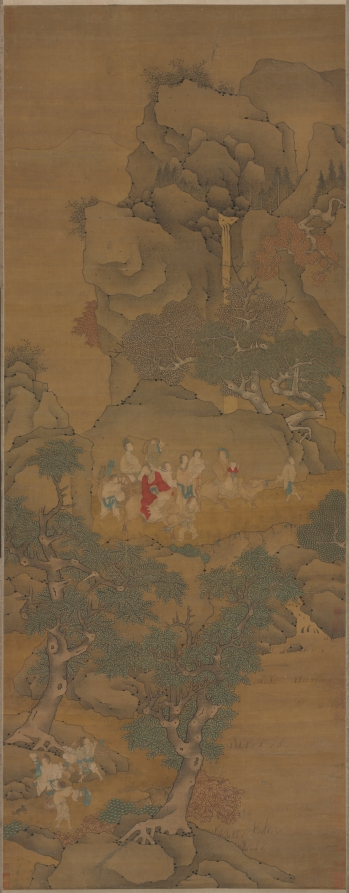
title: Xu Jingyang Moving His Family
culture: China, Ming dynasty (1368–1644)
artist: Cui Zizhong (Chinese, 1574–1644)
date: 1644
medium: Hanging scroll; ink and color on silk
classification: Painting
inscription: Artist's 2 seals: Pei-hai, Cui Zizhong yin.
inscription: 9 additional seals: 2 of Xiang Yuan (18th-19th c.); 1 of Tang Zuomei (late 18th-19th c.); 1 of Zhang Heng 張珩 (1915-1963); 1 of C. C. Wang 王季遷 (1907–2003); 4 unidentified.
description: Xu Jingyang was a dedicated fourth-century Confucian official who allegedly turned into a Daoist immortal. This scroll depicts the legend that when he attained immortality, he took his entire household, including chickens and dogs, to paradise. Cui Zizhong’s painting style intentionally referenced ancient masters. Typical of the pre-Song dynasty landscape tradition, there is the use of blue and green colors and an emphasis on outline rather than texture. While the trembling outlines are reminiscent of earlier painters, the flickering light on rocks and trees is a stylistic feature of Cui’s own time.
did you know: Xu Jingyang, wearing red, is in the upper register of figures, while below his servants transport a rooster, dog, and other supplies.